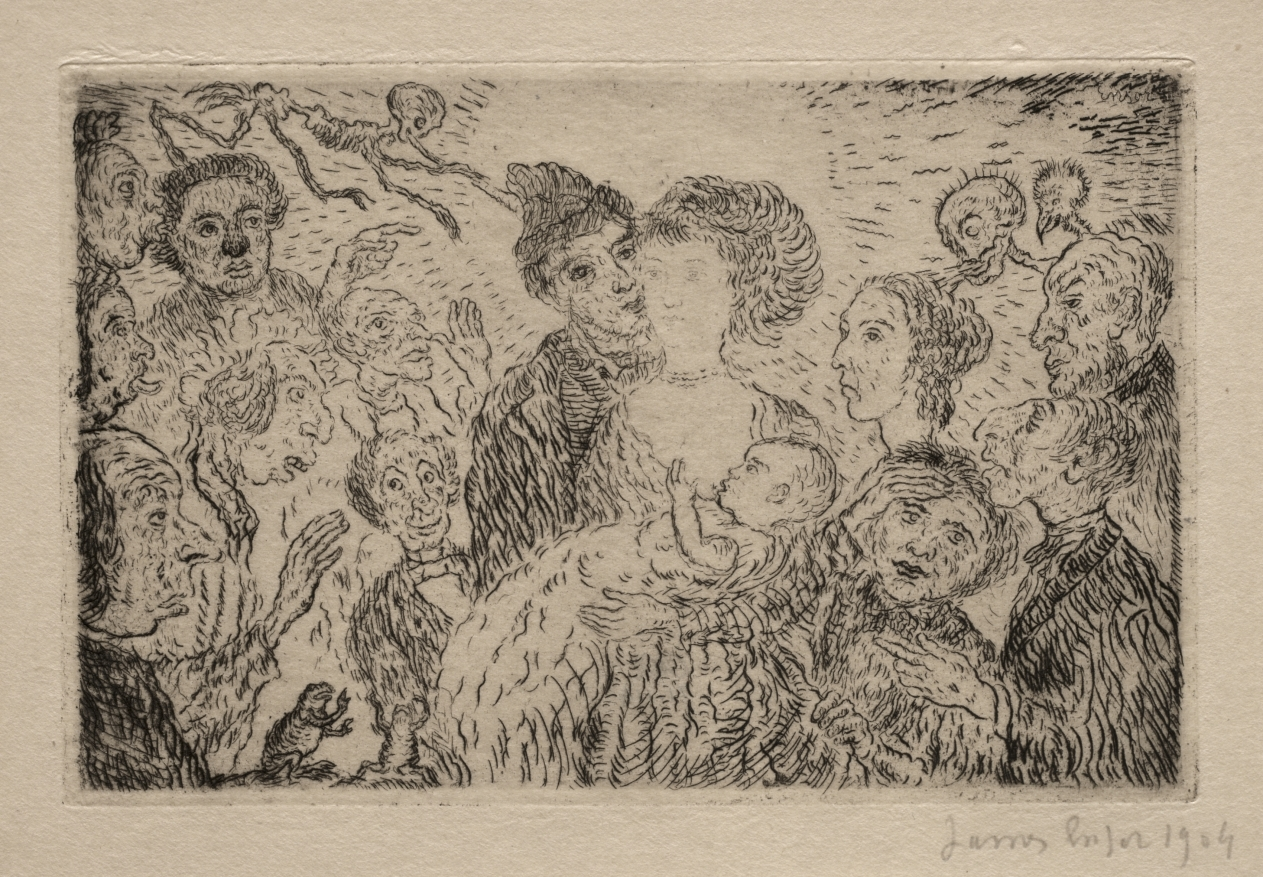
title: The Seven Deadly Sins: Envy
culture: Belgium, 19th-20th Century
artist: James Ensor (Belgian, 1860–1949)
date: 1904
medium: etching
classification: Print